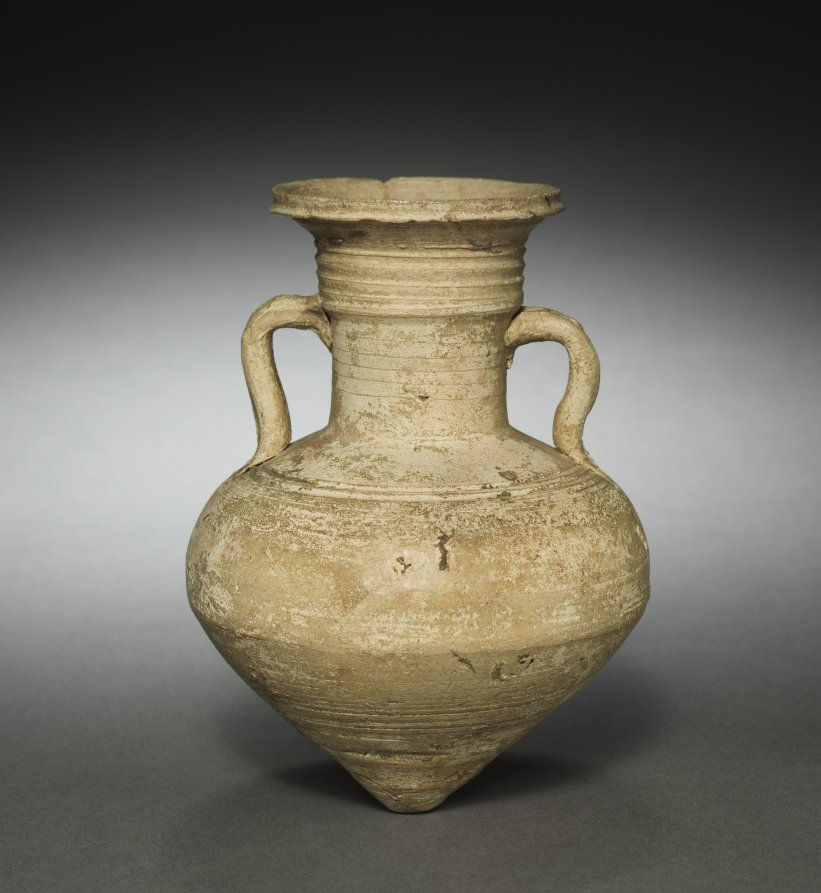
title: Vase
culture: Parthian Empire (247 BCE–224 CE)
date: 1–200 CE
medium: terracotta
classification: Ceramic